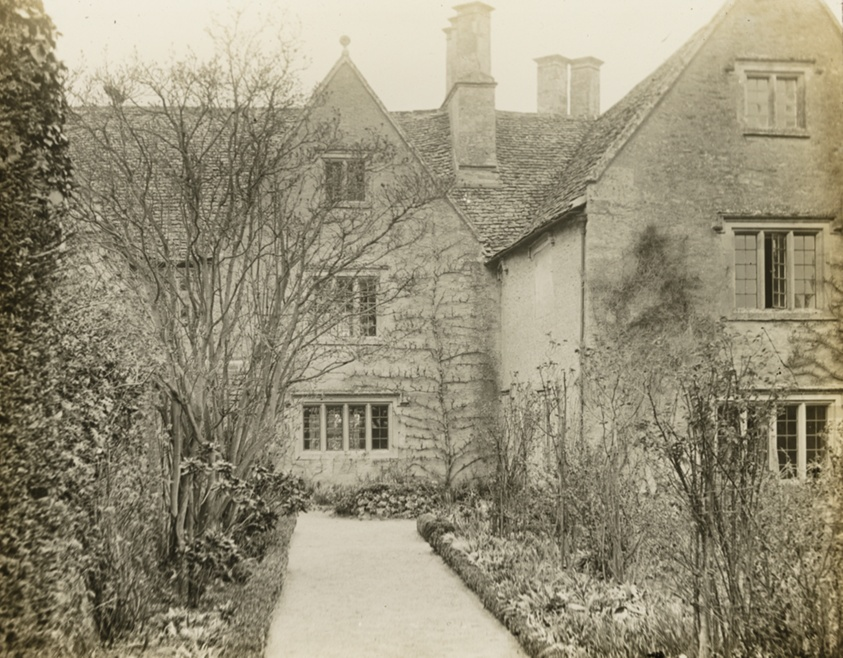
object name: Photograph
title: Kelmscott Manor: The Garden Front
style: Pictorialism, 19th century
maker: Frederick H. Evans (English, 1853–1943)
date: 1896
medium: Lantern slide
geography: England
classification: photograph; photography